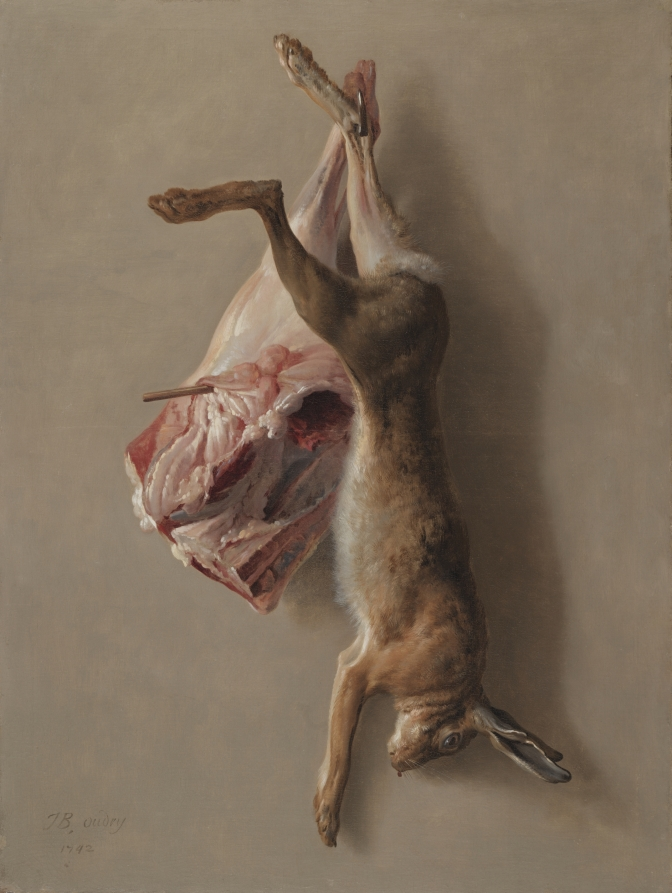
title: A Hare and a Leg of Lamb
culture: France, 18th century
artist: Jean-Baptiste Oudry (French, 1686–1755)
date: 1742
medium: oil on canvas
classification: Painting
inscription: signed lower left: J.B. Oudry / 1742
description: Oudry used a starkly simple composition and sterile background to emphasize his virtuosity in depicting textures, a highly desirable skill of still-life painters at this time. These artists were aiming for the highest level of accuracy—an effect of the Enlightenment, the contemporary intellectual movement that emphasized scientific reasoning in all pursuits. These paintings were generally displayed in hunting lodges or dining rooms, as a glorification of the hunt and the bounty it brings.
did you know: This lavish display of game was painted one year after a devastating famine gripped France.